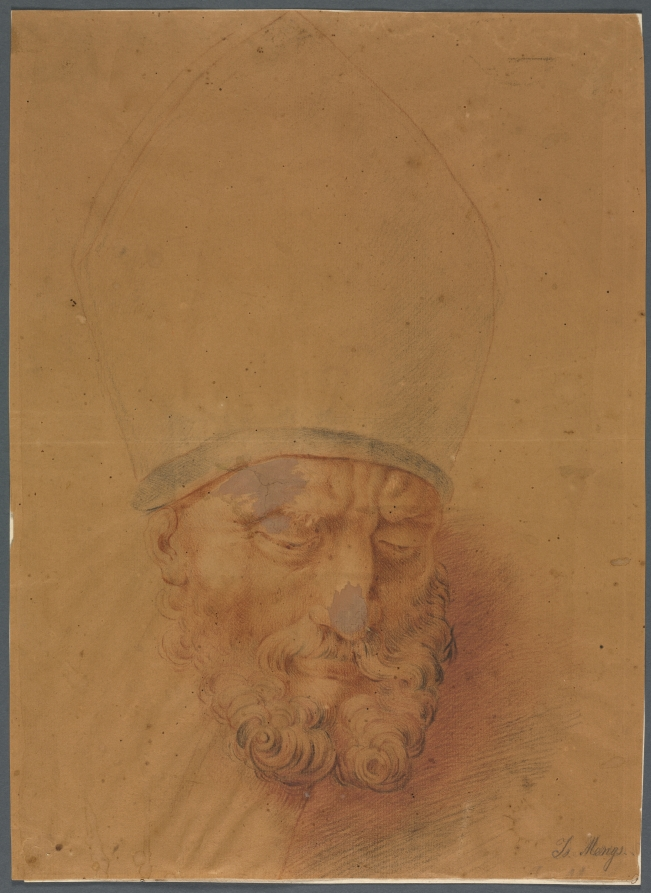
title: Head of a Bishop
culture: Germany, 18th century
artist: attributed to Anton Raphael Mengs (German, 1728–1779)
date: third quarter 1700s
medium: red and black chalk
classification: Drawing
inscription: lower right, in graphite: To. Mengs. ; SECONDARY SUPPORT, lower center, in brown ink: Ismael Mengs del 1712 ; lower right, in brown ink: P. [R?][illegible]